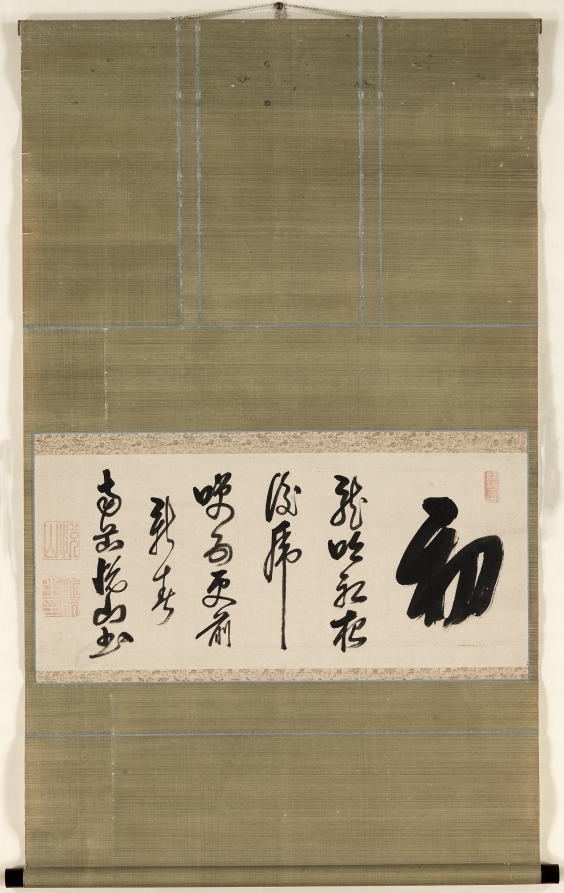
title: Calligraphy in Semi-Cursive Style (xing-caoshu)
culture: China, Qing dynasty (1644–1911)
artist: Yueshan Daozong (Chinese, 1629–1709)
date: c. 1660–1709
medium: Hanging scroll; ink on paper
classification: Calligraphy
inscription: 初/ 龍吟初夜後，虎嘯五更前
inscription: 悅山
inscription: 道宗之印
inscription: Linji zheng zong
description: This spontaneous, bold calligraphy style is characteristic of members of the Japanese Ōbaku school (Huangbo in Chinese) of Chan (Zen in Japanese) Buddhism, which was founded in Japan by Chinese monks in the 1600s. The monk Yueshan emigrated to Japan from the Chinese province of Fujian, taking a priestly post at Manpukuji, the headquarters of the Ōbaku school in Japan. He later became the seventh abbot of the distinguished temple. Yueshan’s calligraphy features rounded characters that allow him to fuse strokes and characters in speedy brush movements. Here the text begins with the large character chu (初, “the beginning”), the initial focus of meditation on the text: The dragon murmurs after sunset. The tiger roars before dawn.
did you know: Ōbaku-style calligraphy favors rounded—rather than angular—brushstrokes. It is not a subtle style of calligraphy, as the Chan monks preferred a bold approach.